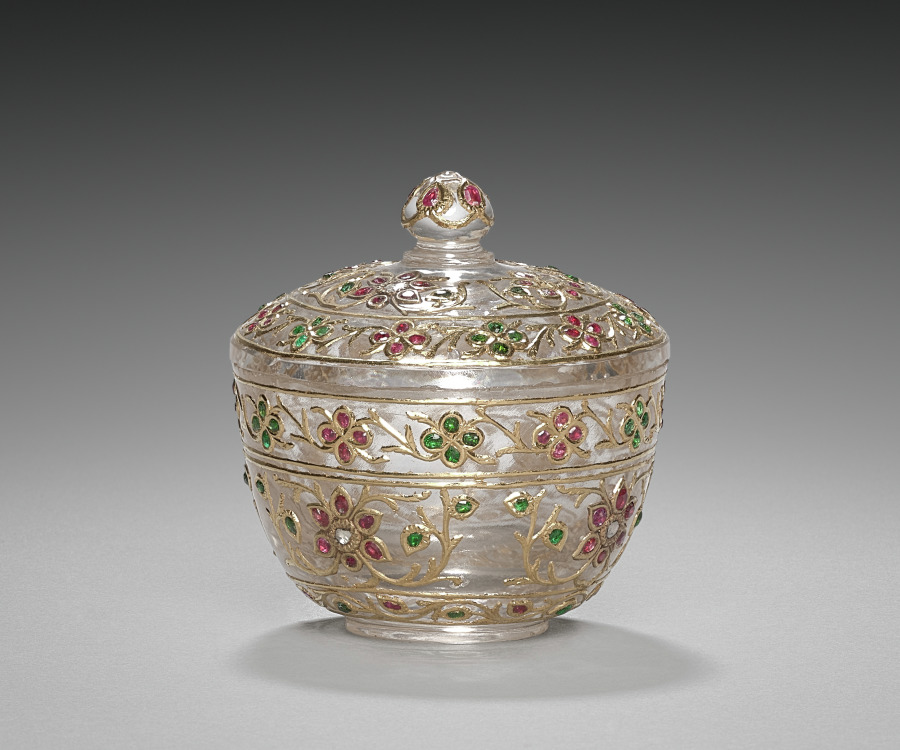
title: Jar with Cover and Saucer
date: 1700s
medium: crystal set with gold and jewels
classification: Jewelry